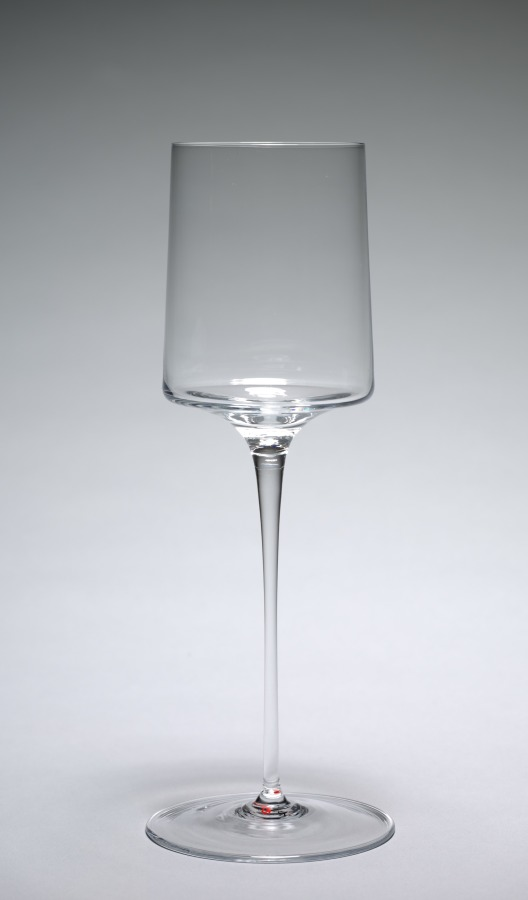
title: Wine Glass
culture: Germany, 20th century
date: 20th century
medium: crystal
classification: Glass